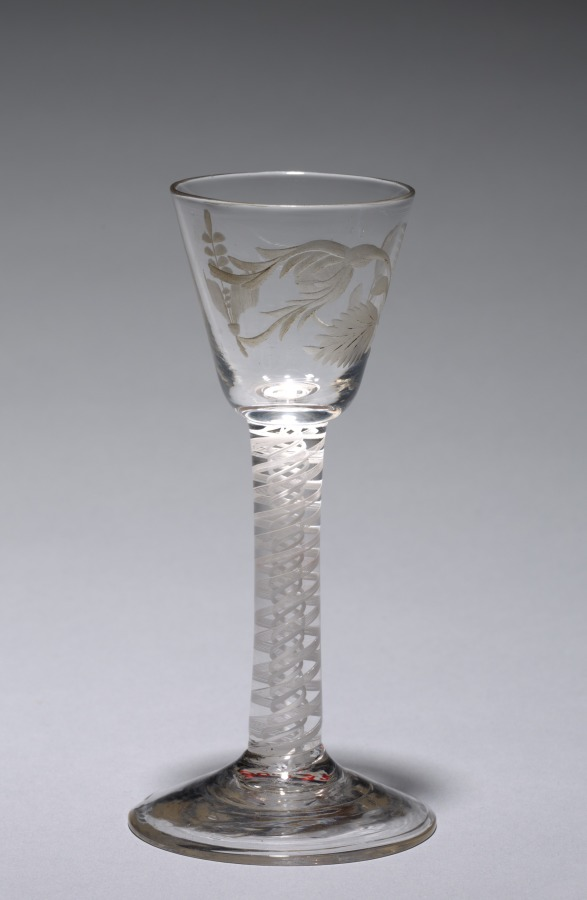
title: Wine Glass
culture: England, 18th century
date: 1750–1799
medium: glass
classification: Glass